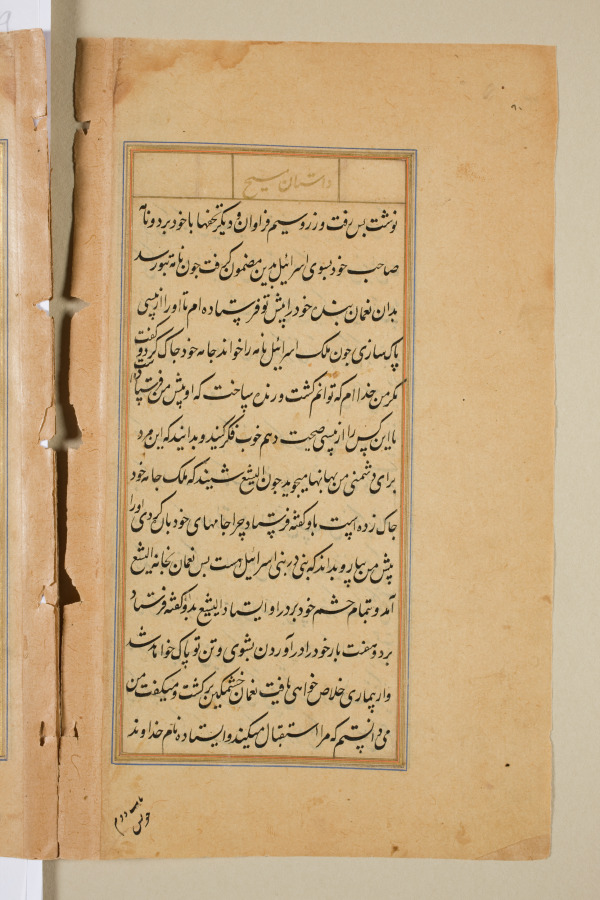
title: Text page from a Mirror of Holiness (Mir’at al-quds) of Father Jerome Xavier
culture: Mughal India, Allahabad, made for Prince Salim (1569–1627)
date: 1602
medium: Ink and gold on paper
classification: Manuscript